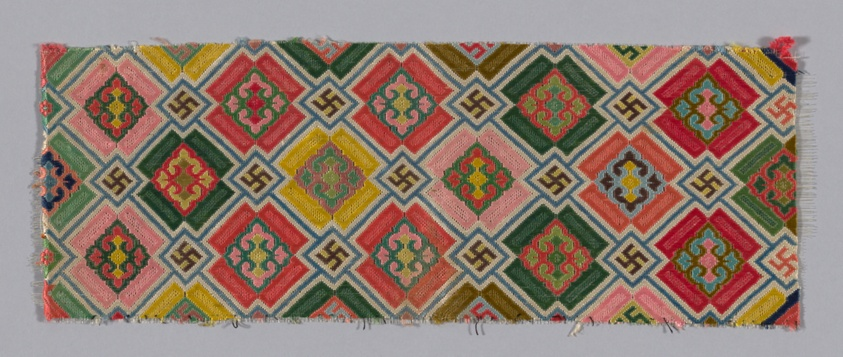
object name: Costume and Accessories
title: Band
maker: Han-Chinese (China)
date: Qing dynasty (1644–1911), 1875/1900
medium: Forty-four pairs and eight odd pieces of embroidered sleeve, ankle bands, etc. on gauze.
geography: China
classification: costume - embroidery; embroidery; costume